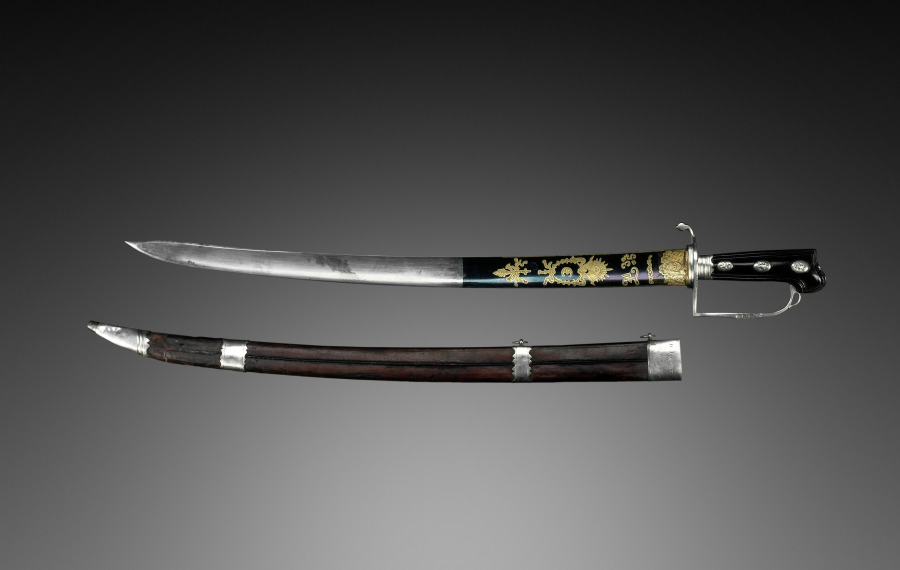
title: Hunting Sword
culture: England, London, 18th century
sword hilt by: William Kinman (British, 1724–1788?)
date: 1778–79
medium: Blued, etched, and gilded steel; hilt: silver, wood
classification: Arms and Armor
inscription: Inscription: D. DRURY, CUTLER TO HIS MAJESTY, STRAND